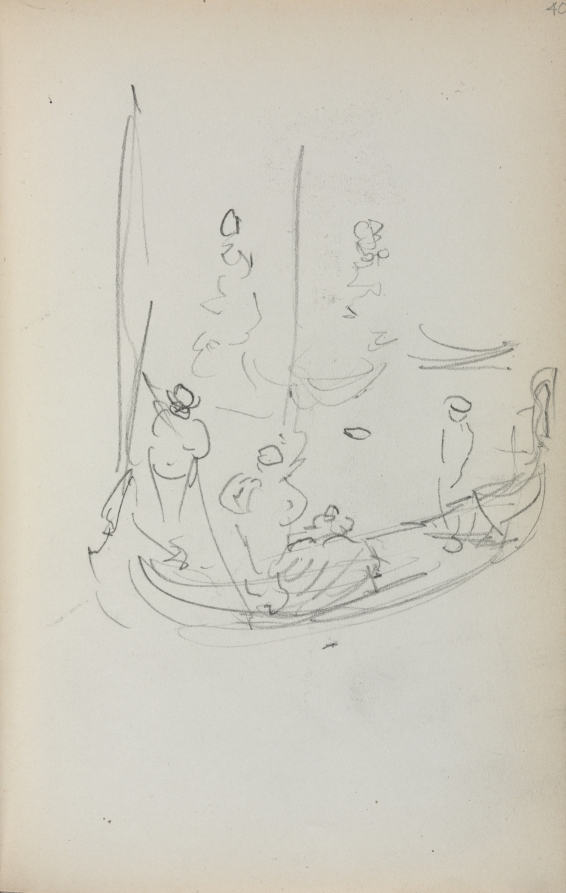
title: Italian Sketchbook: Gondola (page 40)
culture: America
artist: Maurice Prendergast (American, born Newfoundland [now Canada], 1858–1924)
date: 1898–1899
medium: pencil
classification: Bound Volume